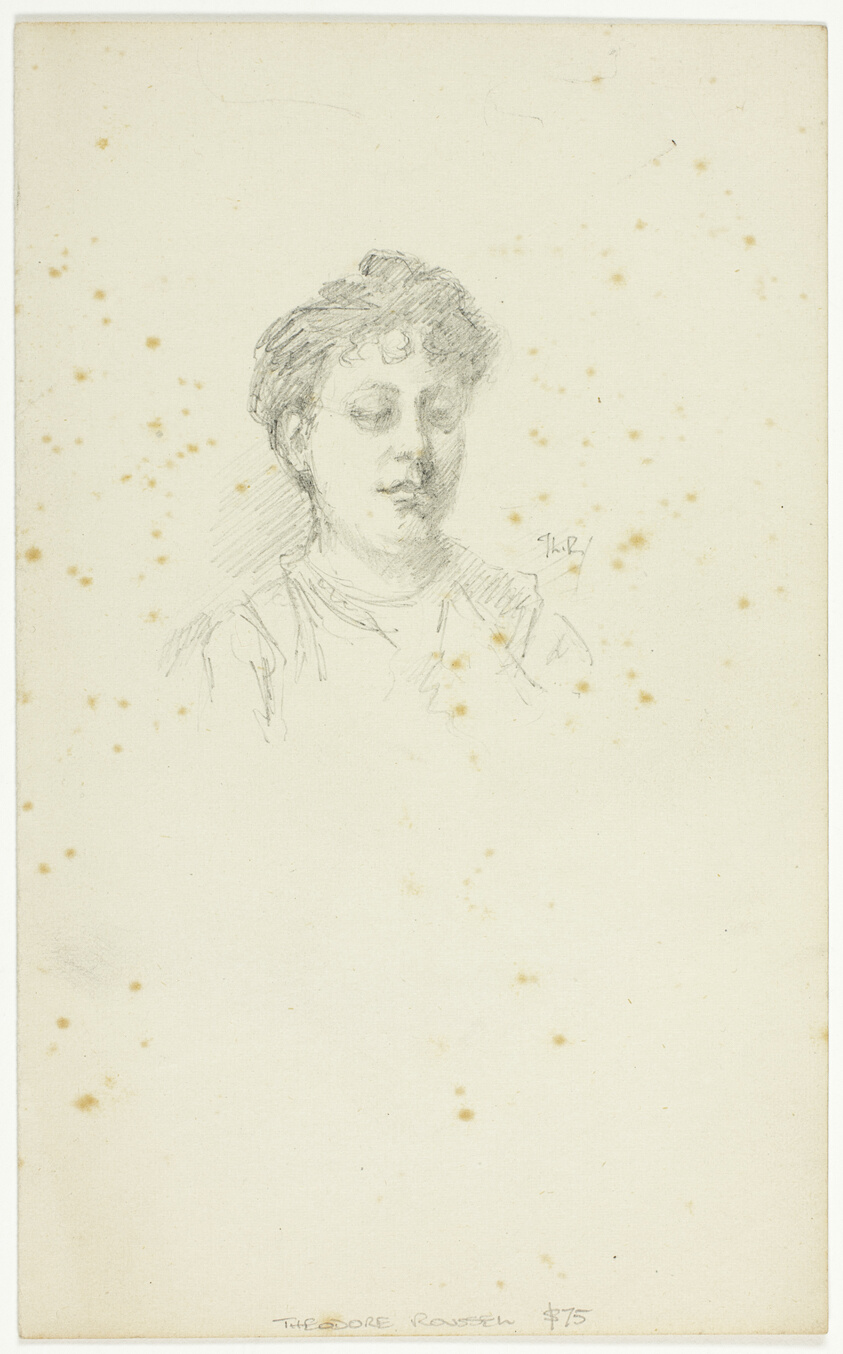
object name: Drawing and Watercolor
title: Sketch of Edith Austin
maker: Theodore Roussel (French, worked in England, 1847-1926)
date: c. 1895–1900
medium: Graphite on cream wove paper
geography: England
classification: graphite; prints and drawing; paper